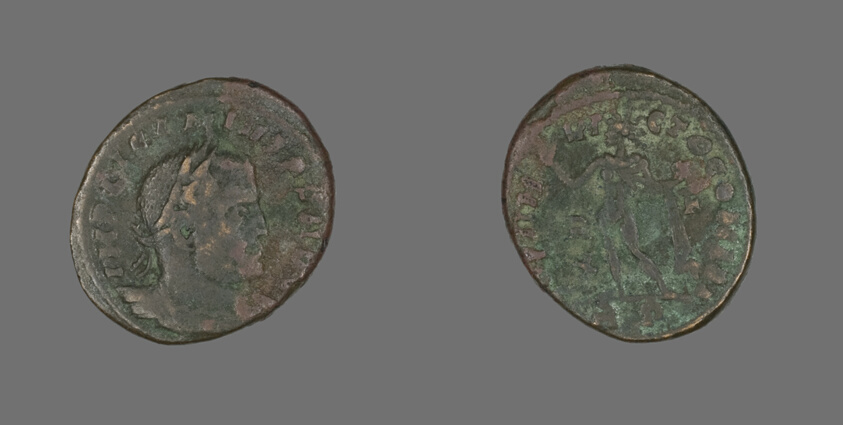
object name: Coin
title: Follis (Coin) Portraying Emperor Licinius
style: roman (ancient, style or period)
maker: Roman, minted in Rome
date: 314-315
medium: Bronze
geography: Roman Empire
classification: coin; ancient art